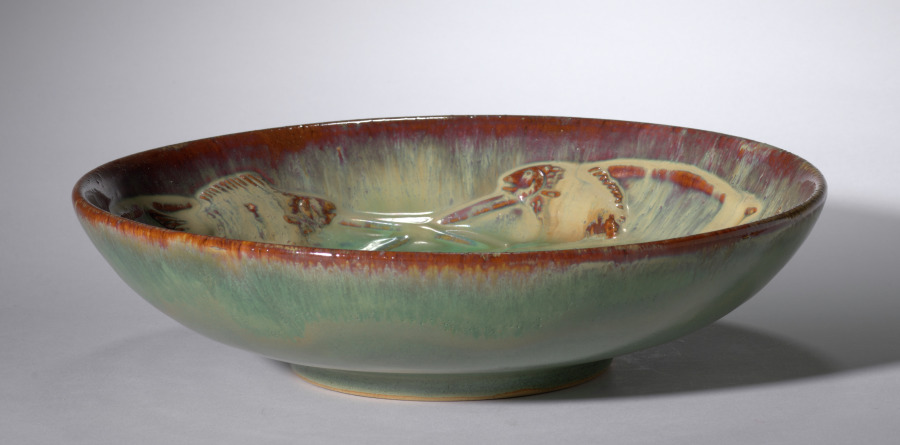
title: Bowl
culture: America, New Jersey, 20th century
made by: Fulper Pottery (American)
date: c. 1910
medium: stoneware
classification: Ceramic